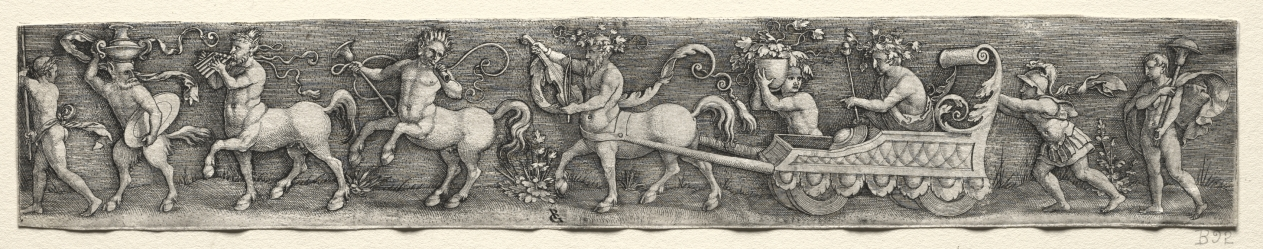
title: Triumph of Bacchus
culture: Germany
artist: Georg Pencz (German, c. 1500–1550)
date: c. 1539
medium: engraving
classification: Print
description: A triumph was a civic ceremony and procession from antiquity, when military commanders were celebrated upon their return to Rome with the spoils of war. The grandeur and magnificence of such events, revived during the Renaissance, makes the diminutive size of these whimsical images of Bacchus’s triumphs even more amusing. The orderly parade depicted by Georg Pencz contrasts with the chaotic scene taking place in Johann Theodor de Bry’s engraving. Such small prints were meant to be enjoyed up close, perhaps with a magnifying glass, a socially acceptable examination of humorous or erotic content performed by a cast of scantily clad mythological characters.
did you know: Georg Pencz is among a group of engravers known today as the "Little Masters" for the many small prints they created, such as this one, which often required the use of a magnifying glass.